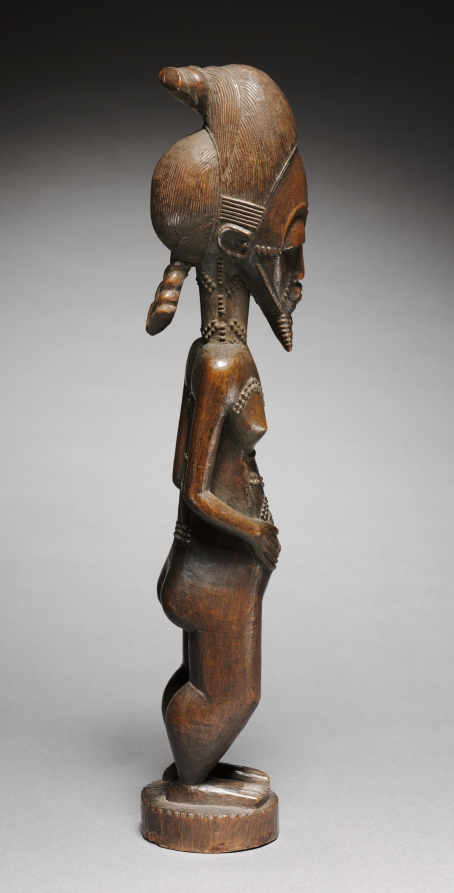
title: Male Figure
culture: Africa, West Africa, Côte d'Ivoire, Baule peoples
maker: Totokro Master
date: by 1931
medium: wood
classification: Sculpture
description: Purported to be the earliest surviving work by a Baule carver who art historians have dubbed the "Totokro Master," this Male Figure typically comes as a pair of male and female sculptures, and serves as a bridge between the spirit (asye usu) and human worlds in the hand of Baule diviners. Representing idealized humans in their prime, the diviners consider them suitable forms used to cast out disruptive spirits. It is featured here without the female example. The African Art Sponsors—a group of donors associated with Cleveland’s Karamu House, the oldest African American theater group in the country—purchased this Baule male figure in 1929 and donated it to the museum in 1931.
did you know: In Baule society, the name of the artist who made a sculpture is not always public knowledge. In 1999, art historian Susan Vogel gave the sculptor of this work and others similar in style the nickname "Totokro Master" for the geographic region they came from.